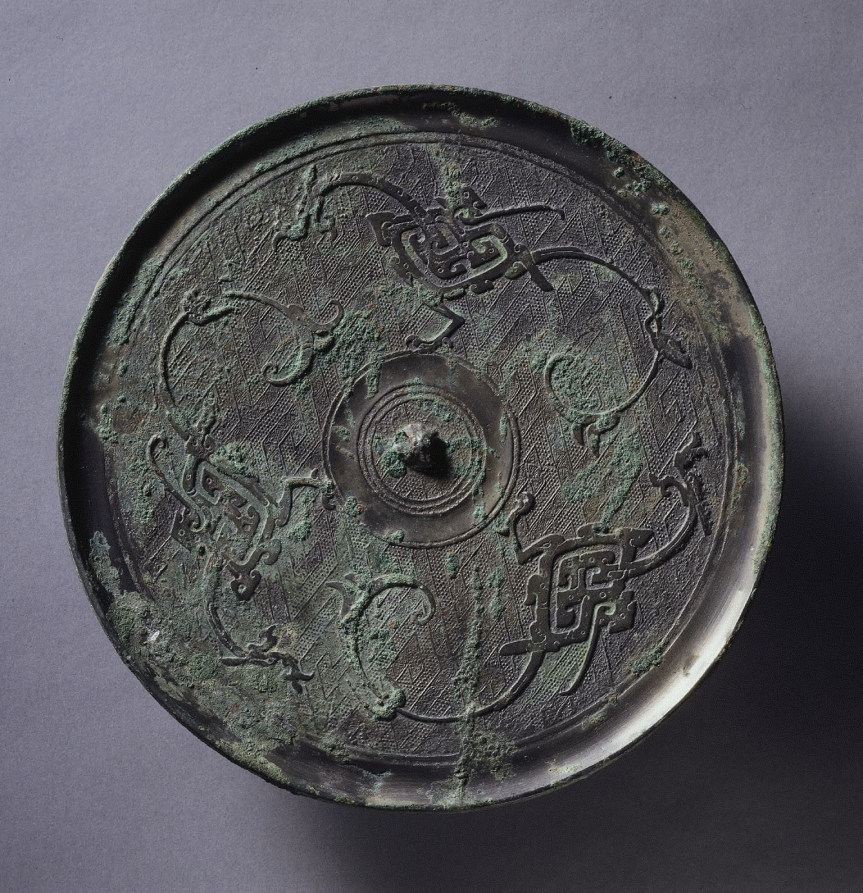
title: Mirror with Three Dragons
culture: China, Eastern Zhou dynasty (770–256 BCE), Warring States period (475–221 BCE)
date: 200s BCE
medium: bronze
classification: Metalwork